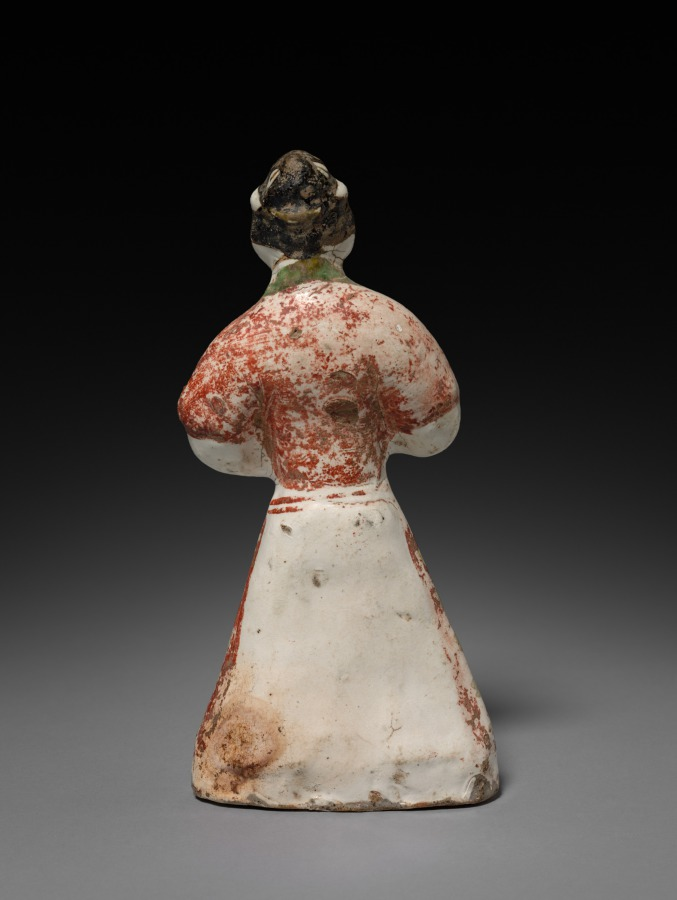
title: Lady Holding a Vase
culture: China, Northern Song dynasty (960-1127) - Jin dynasty (1115-1234)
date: 1100s–1200s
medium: Stoneware with slip decoration, Cizhou ware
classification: Ceramic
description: The Cizhou ware kilns never produced for the imperial court, but made potted utensils needed in daily life. They also fired ceramic figurines, which are believed to have been used as toys. The maid or palace lady here holds a long-necked vase of a type that watered flowers. The figurine, perhaps made as a toy for a girl, was molded in clay and covered with a white slip and transparent glaze, over which some colors in red, green, and ocher were applied. Cizhou kiln potters were one of the first in China who applied overglaze enamel-like colors on glazed, high-fired ceramics.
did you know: This hollow stoneware figure of a woman has firing hole visible at the bottom.